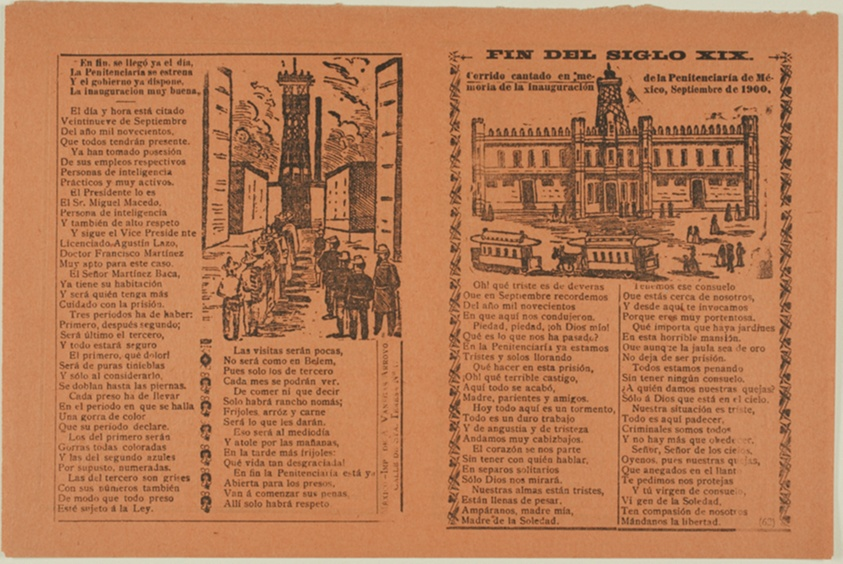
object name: Print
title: End of the XIX Century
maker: José Guadalupe Posada (Mexican, 1852-1913)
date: September 1890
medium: Double-sided relief etching on zinc on paper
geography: Mexico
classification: lithograph; print; prints and drawing